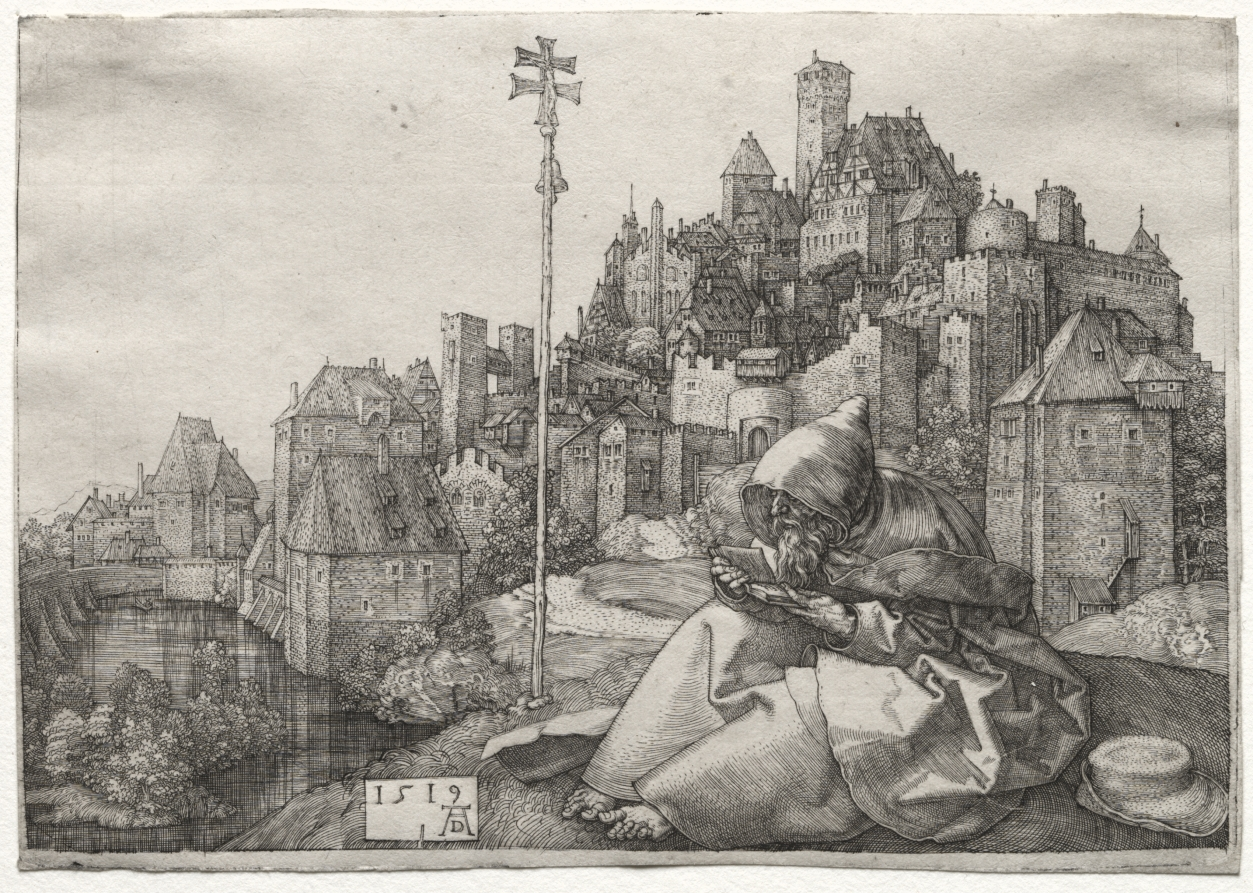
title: St. Anthony Reading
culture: Germany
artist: Albrecht Dürer (German, 1471–1528)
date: 1519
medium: engraving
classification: Print